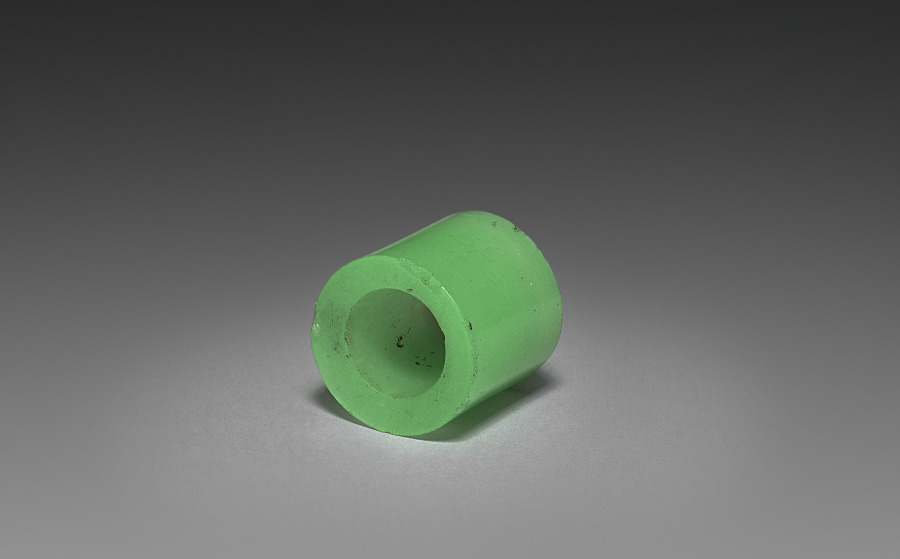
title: Earring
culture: Burma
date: 1800s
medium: glass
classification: Jewelry